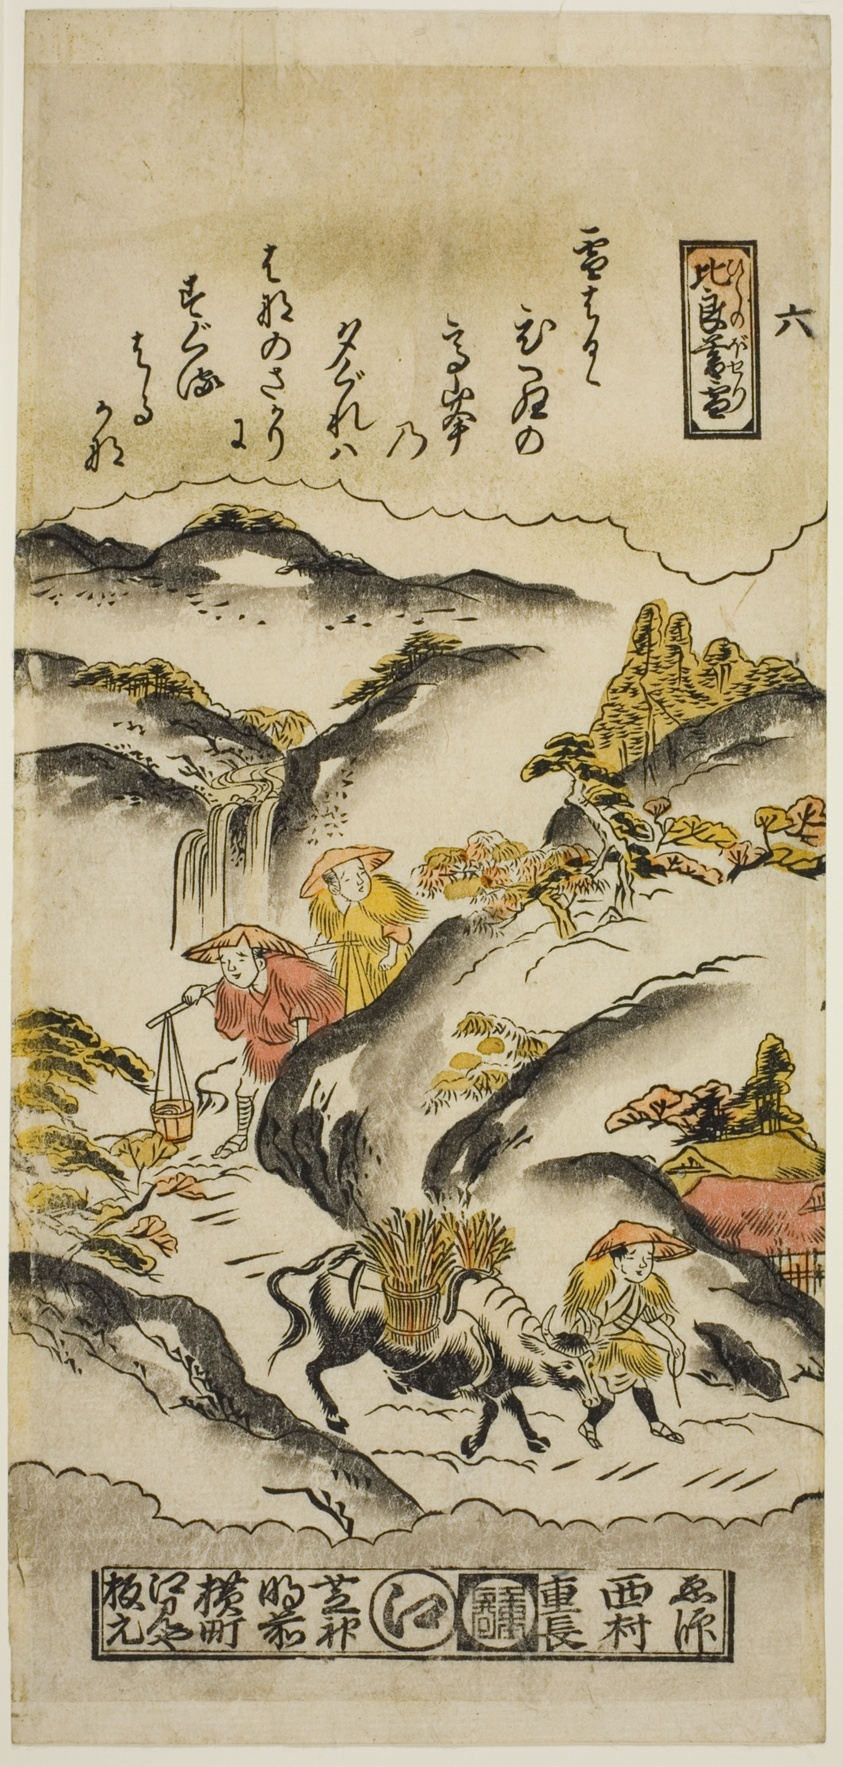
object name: Print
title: Evening Snow on Mt. Hira (Hira no bosetsu), No. 6 from the series "Eight Views of Omi"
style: Japanese (culture or style)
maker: Nishimura Shigenaga (Japanese, 1697 (?)-1756)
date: c. 1716/36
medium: Hand-colored woodblock print; hosoban, urushi-e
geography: Japan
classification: woodblock print; print; asian art